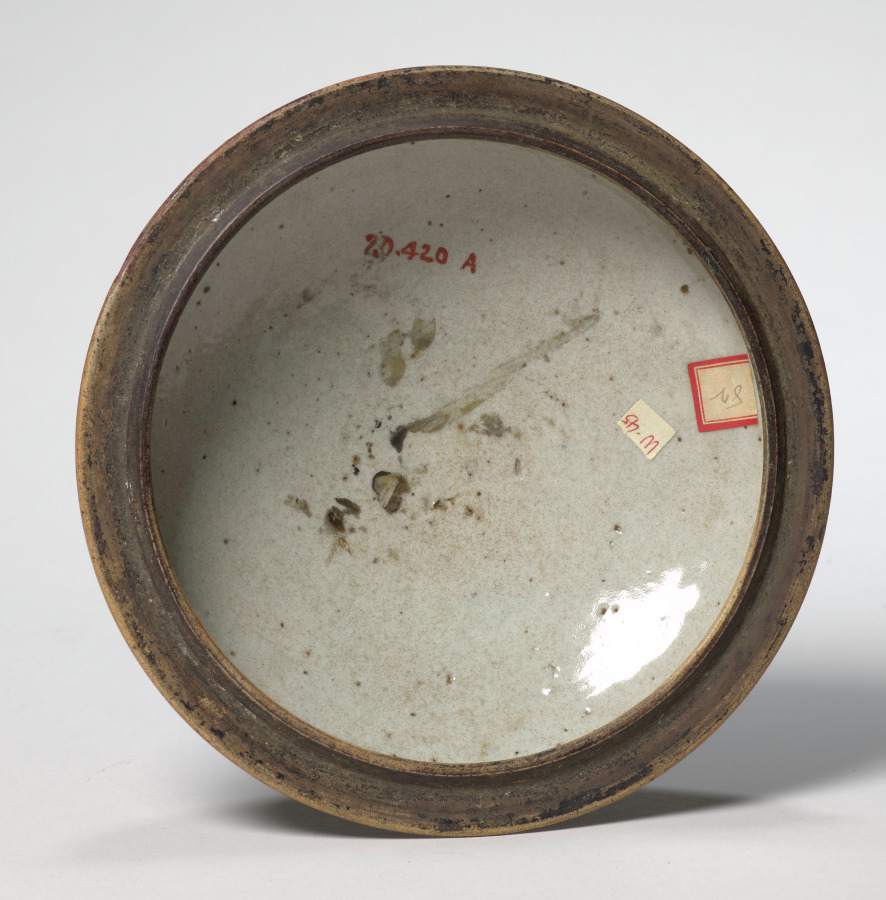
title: Jar (lid)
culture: Siam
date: 1800s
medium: porcelain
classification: Ceramic